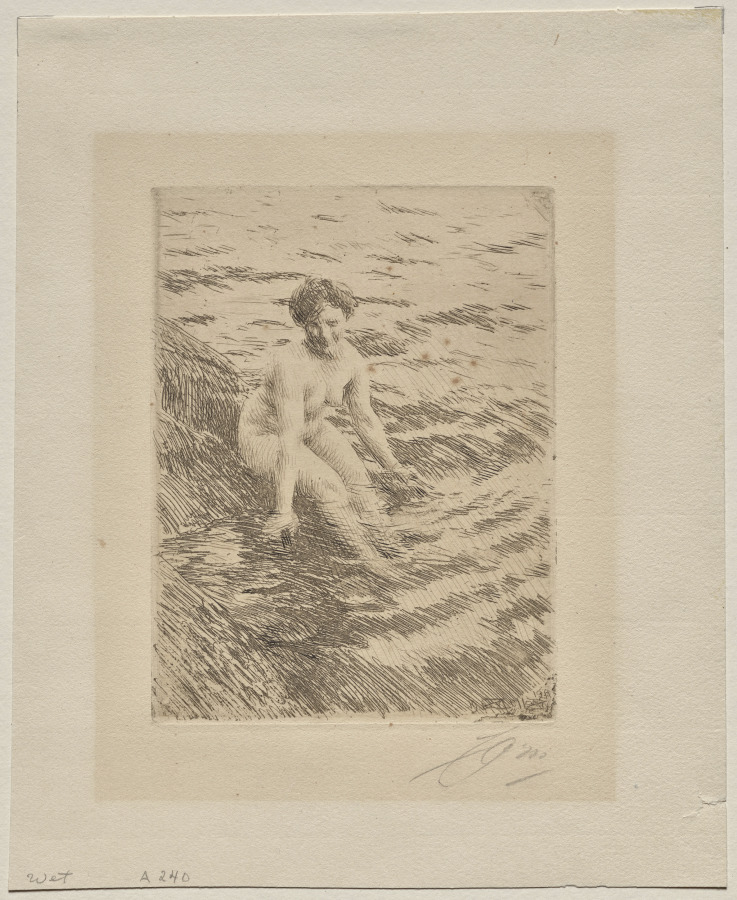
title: Wet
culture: Sweden, 20th century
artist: Anders Zorn (Swedish, 1860–1920)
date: 1911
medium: etching, drypoint and roulette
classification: Print